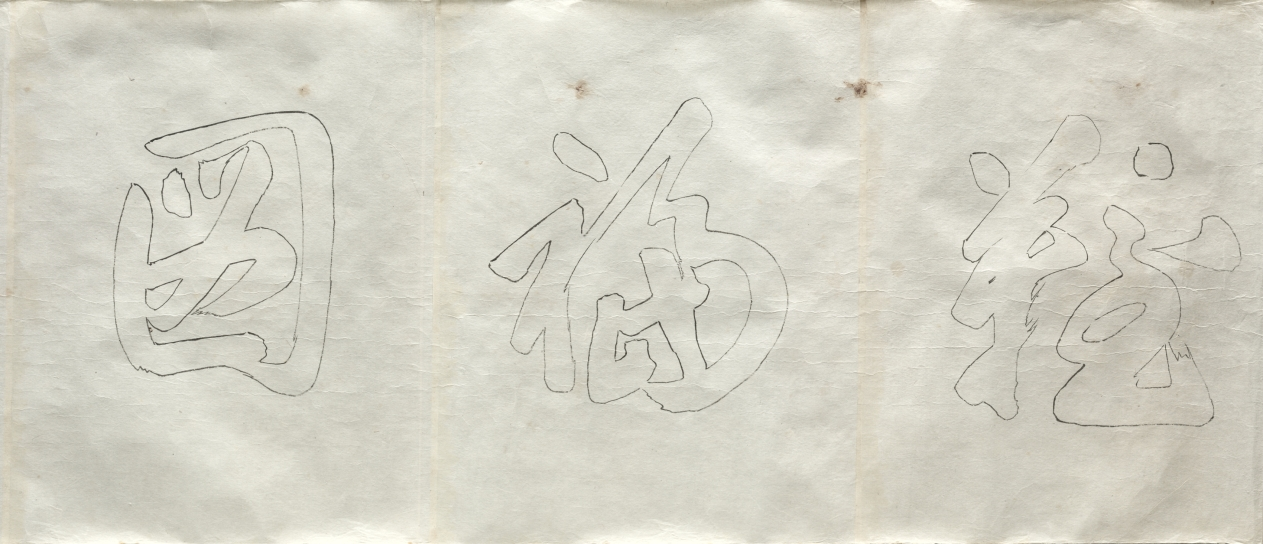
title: Sketch Copy of Natural Disasters, from the Seven Fortunes and Misfortunes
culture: Japan, Edo period (1615–1868) to Meiji period (1868–1912)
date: after 1773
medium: handscroll; ink and color on paper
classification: Painting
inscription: Signed: Gettcho; dated 1773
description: This unmounted handscroll is a copy of the first of a three-scroll set painted by Maruyama Ōkyo (1733–1795) for Buddhist monk Yujō (1723–1773). It depicts people's unfortunate encounters with forces of nature from wind to beasts. Ōkyo's realistic, contemporary imagery was meant to evoke a sense of recognition and empathy in viewers, shocking them into avoidance of possible punishments.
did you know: Notations that appear throughout the scroll indicate colors and other details of the original painting.